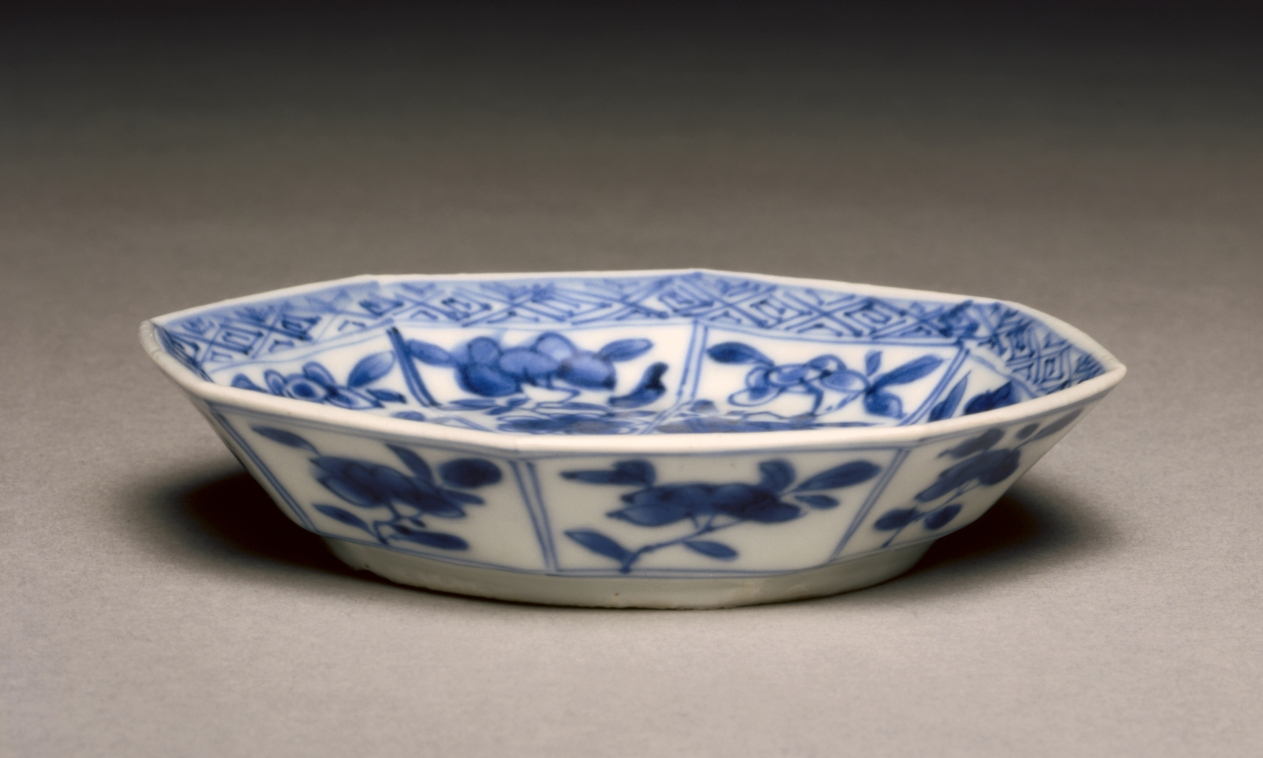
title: Saucer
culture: China, Qing dynasty (1644-1911)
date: c. 1690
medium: porcelain with blue and white decoration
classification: Ceramic